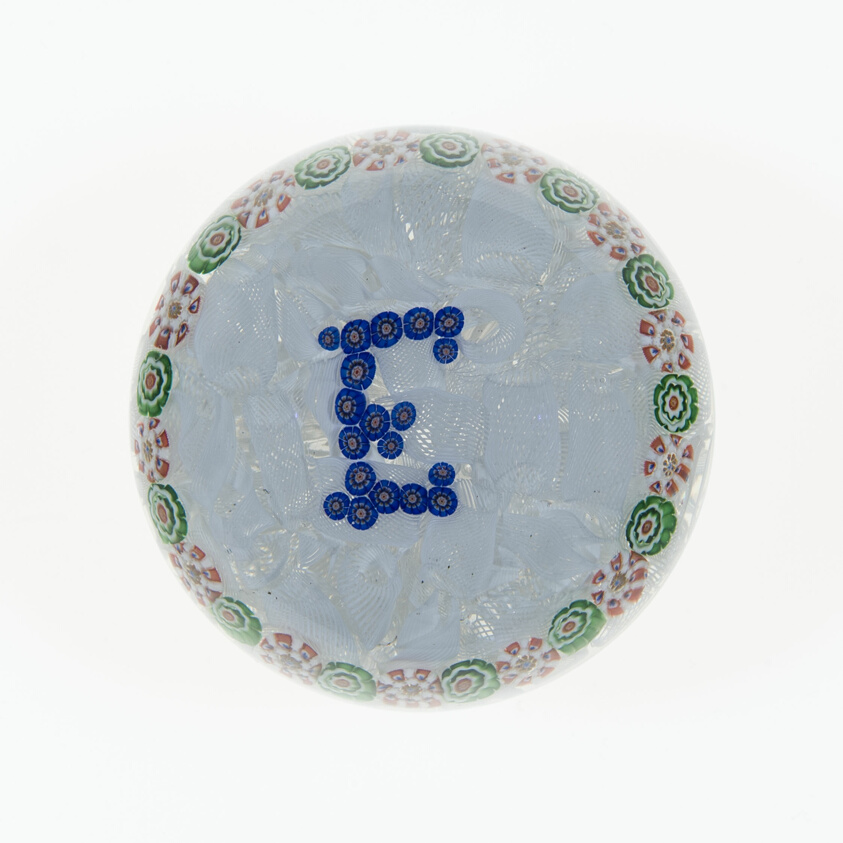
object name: Glass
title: Paperweight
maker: Baccarat Glassworks (Cristalleries de Baccarat); Lorraine, France, founded 1764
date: c. 1846–55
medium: Glass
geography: Lunéville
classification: paperweight; millefiori; european decorative arts; glass